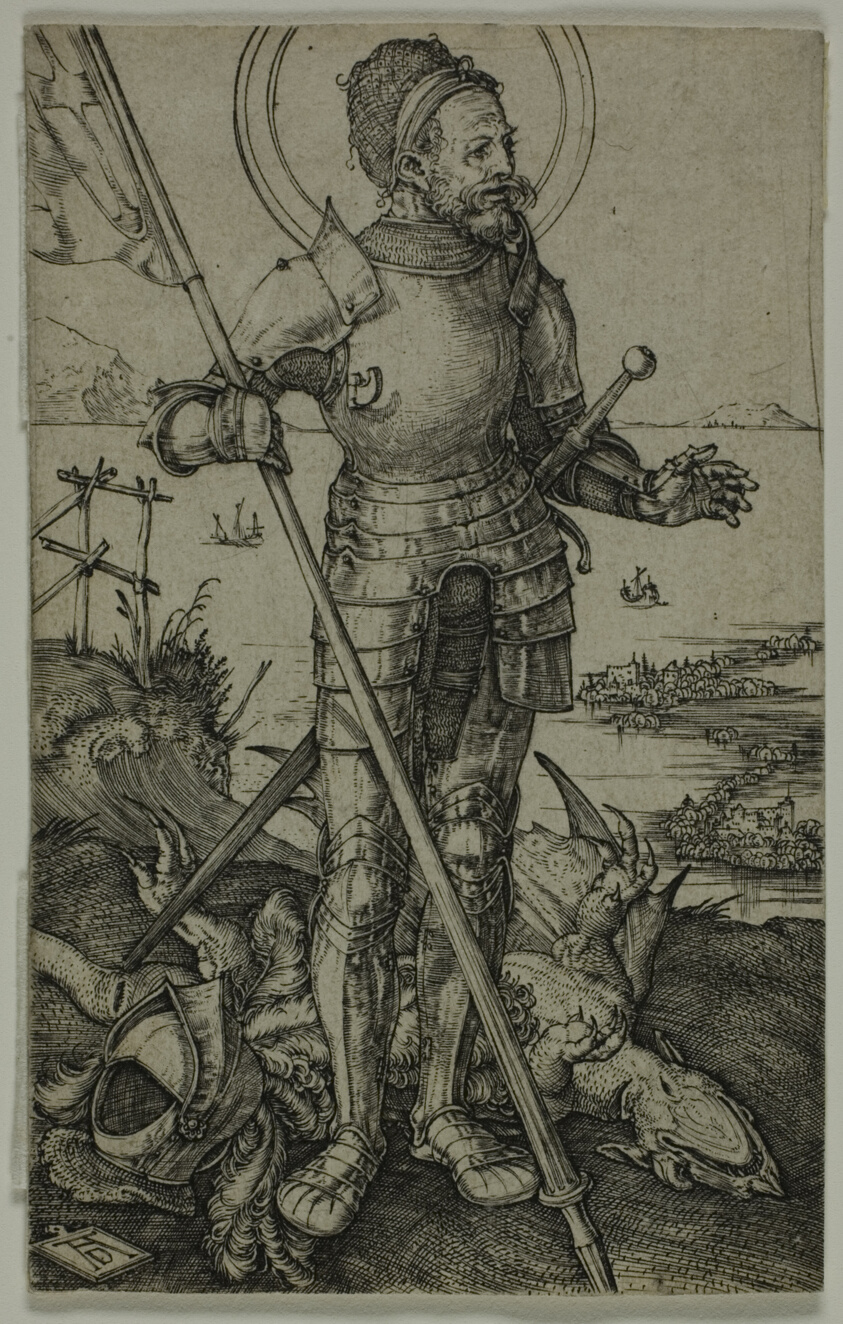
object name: Print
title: St. George on Foot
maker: Albrecht Dürer (German, 1471-1528)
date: 1502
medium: Engraving in black on cream laid paper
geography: Germany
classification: engraving; print; prints and drawing; paper